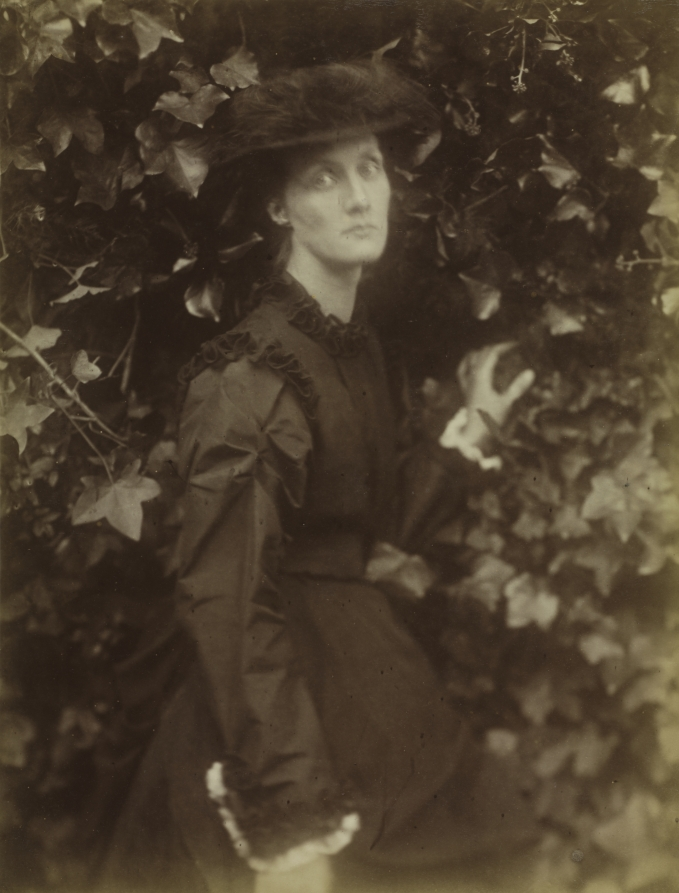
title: Julia Jackson Duckworth (1846-1895)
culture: England, 19th century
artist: Julia Margaret Cameron (British, 1815–1879)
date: 1874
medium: albumen print from wet collodion negative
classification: Photograph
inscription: Written in brown ink on recto of mount: "From Life Registered Photograph Copyright Julia Margaret Cameron Freshwater Sep. 74"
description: One of the renowned beauties of Victorian England, Jackson is seen in the two photographs to the left the year she married barrister Herbert Duckworth at age 21. He died three years later, leaving her with two children and a third on the way. She is seen here at age 28, a Victorian tragic heroine haunted by grief. Pale and hollow-eyed, although still lovely, she stands before a wall of ivy, an evergreen plant that signified eternity and fidelity. Four years later, Duckworth married biographer Sir Leslie Stephen with whom she had four children, including author Virginia Woolf and painter Vanessa Bell. Julia Jackson Duckworth Stephen died of rheumatic fever in 1895 at age 49.